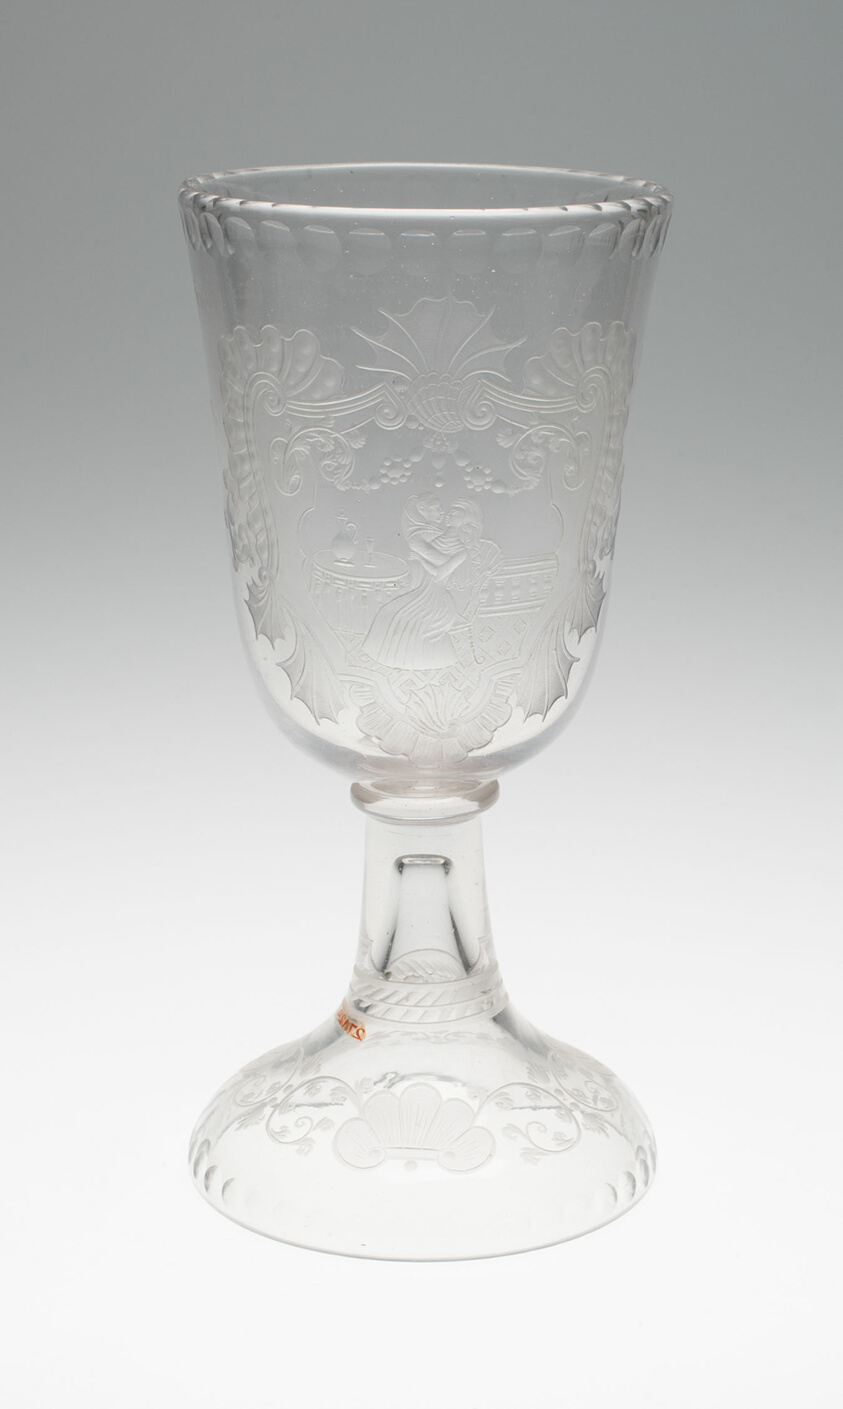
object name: Glass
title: Goblet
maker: Bohemia, Czech Republic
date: c. 1750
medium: Glass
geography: Bohemia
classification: drinking vessel; glass; european decorative arts